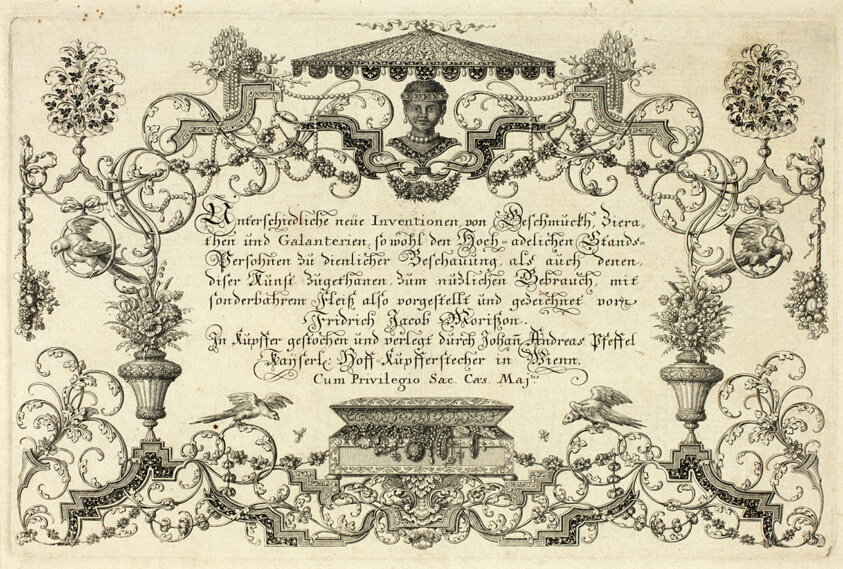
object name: Print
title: Unterschiedliche Neue Inventionen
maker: Johann Andreas Pfeffel I (German, 1674-1748); after Friedrich Jacob Morisson (German, active 1693-1697)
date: before 1697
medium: Engraving in black on cream laid paper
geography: Germany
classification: engraving; print; prints and drawing